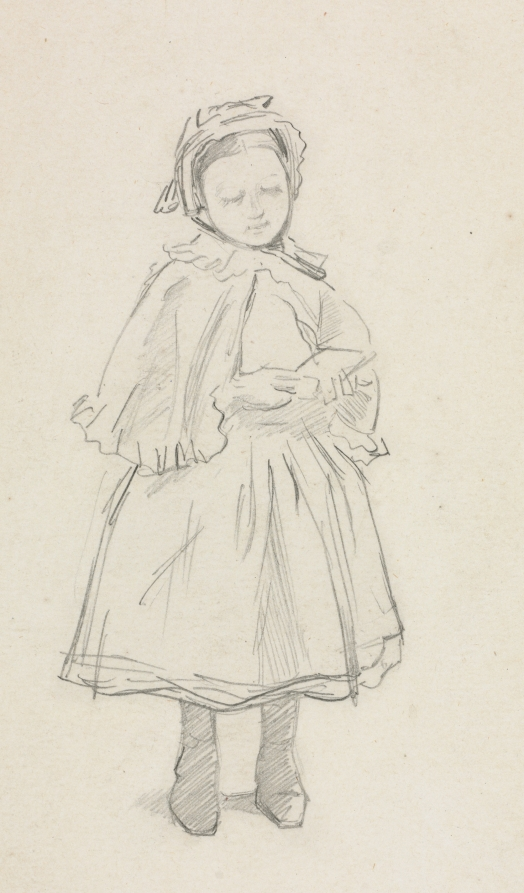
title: Study for a Little Girl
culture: England, 19th century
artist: Charles Samuel Keene (British, 1823–1891)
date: c. 1851–91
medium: graphite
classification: Drawing